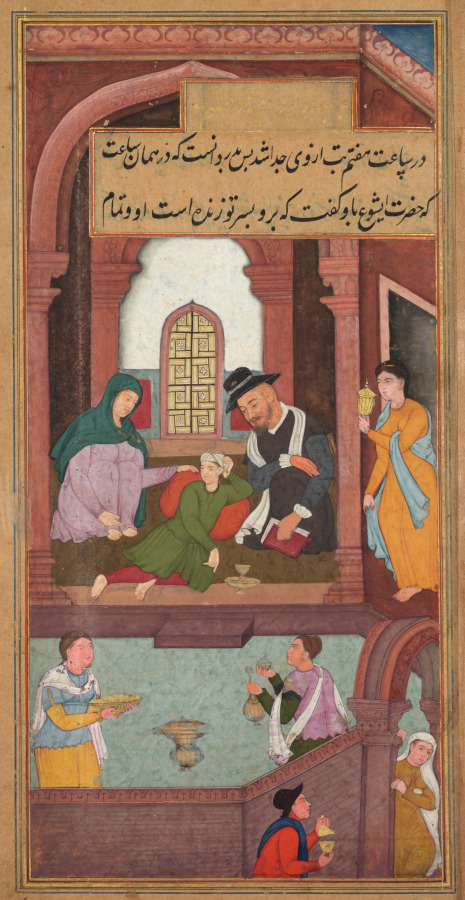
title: Jesus Heals the Nobleman’s Son in Capernaum (folio 70 recto), from a Mirror of Holiness (Mir’at al-quds) of Father Jerome Xavier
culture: Mughal India, Allahabad, made for Prince Salim (1569–1627)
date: 1602–4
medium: Gum tempera, ink, color, and gold on paper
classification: Manuscript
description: The diminutive figure wearing green in the center of the composition is the young son of a nobleman who was dying. Jesus healed him from afar so quickly that the subsidiary figures at the periphery of the scene are still anxious and bringing pots of remedies. This painting is unfinished; the border of the carpet and the geometric tile patterns on the floor of the forecourt have not been painted. An unknown number of artists with different backgrounds, skills, and experience contributed to this project, and even this work appears to be by at least two different hands.